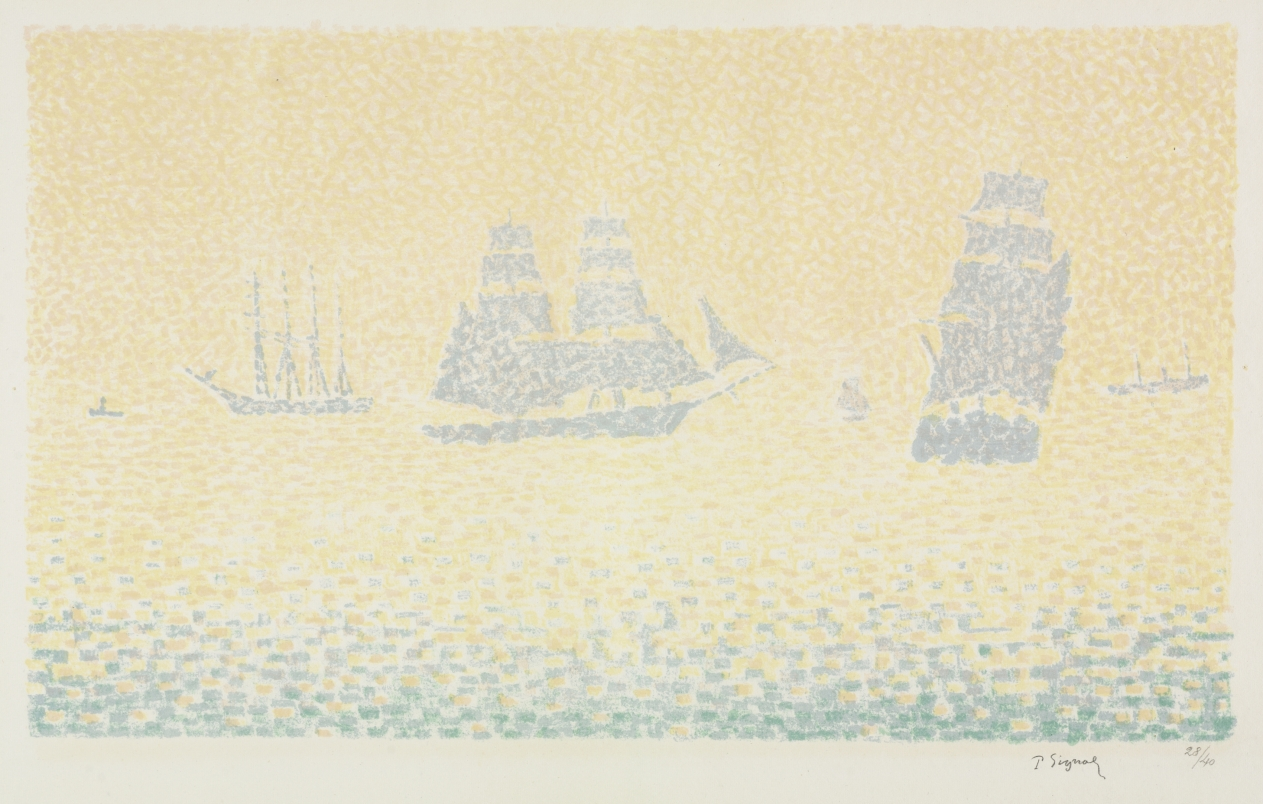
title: Boats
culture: France, 18th-19th century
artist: Paul Signac (French, 1863–1935)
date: c. 1890s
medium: lithograph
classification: Print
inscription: In graphite, recto, lower left: "100"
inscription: In graphite, recto, lower right: "P. Signac (signed) 28/40"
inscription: In graphite, recto, lower right: "100, Les Bateaux"